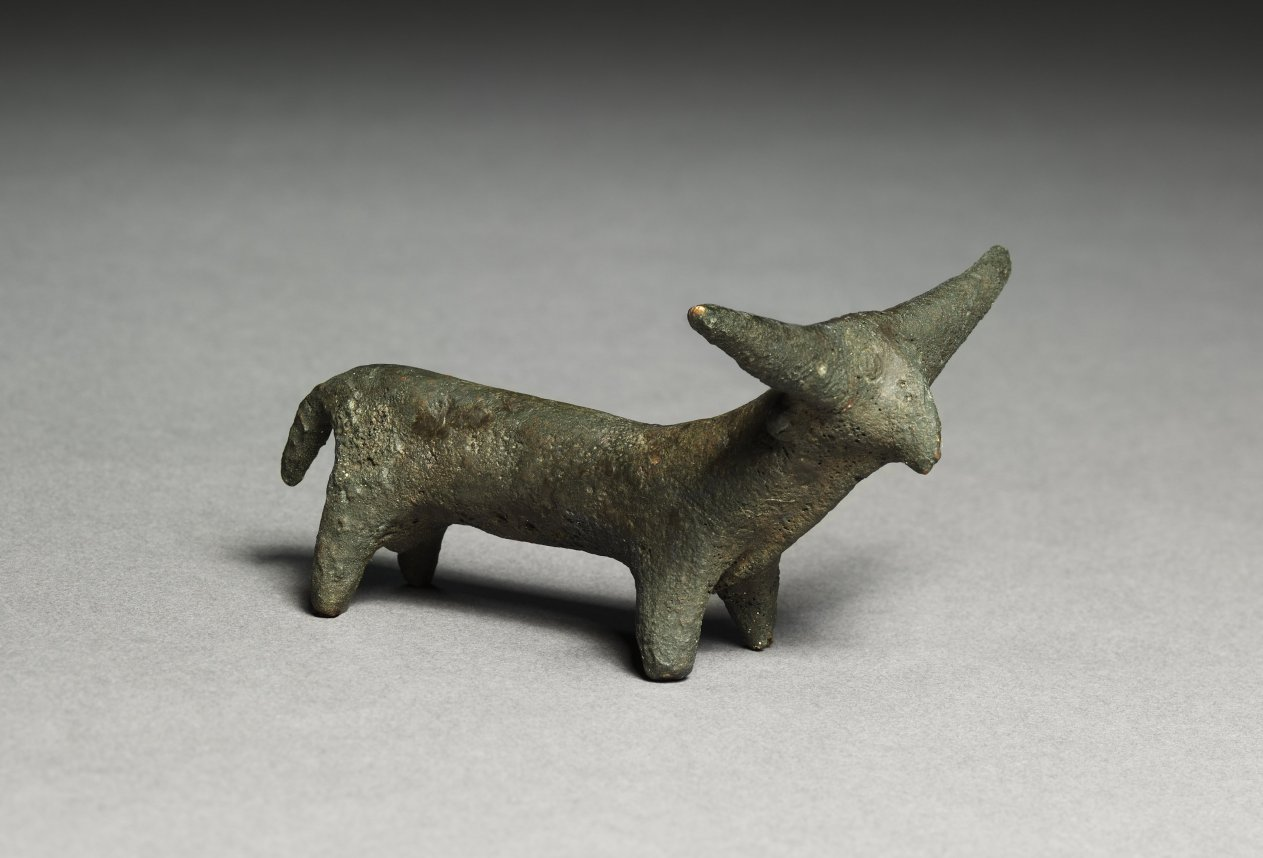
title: Standing Bronze Bull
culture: probably Anatolia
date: late 3000s BCE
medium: bronze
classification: Sculpture